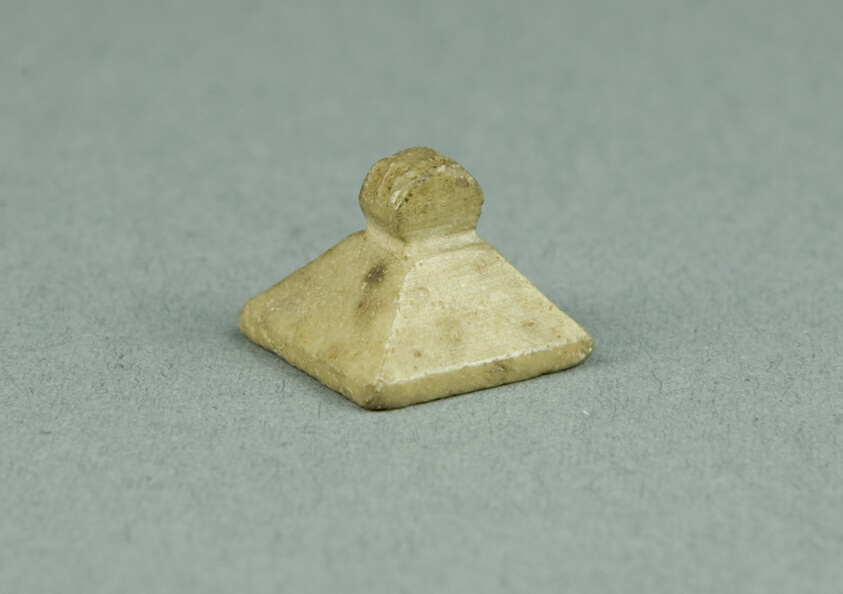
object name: Costume and Accessories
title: Amulet of a Stamp Seal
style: egyptian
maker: Egyptian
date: Late Period, Dynasties 26–31 (664–332 BCE)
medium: Stone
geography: Egypt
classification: amulet; jewelry; ceramics; ancient art; costume